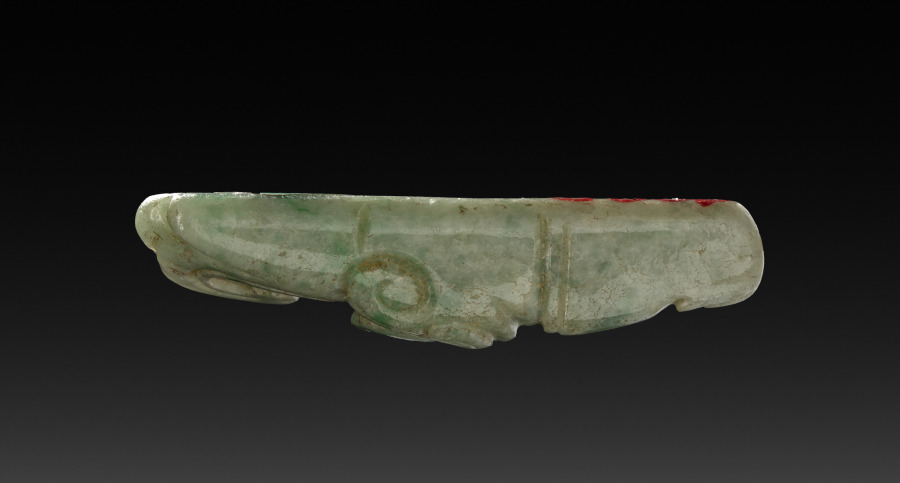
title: Pendant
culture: Maya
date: 250–900 CE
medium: jadeite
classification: Jade